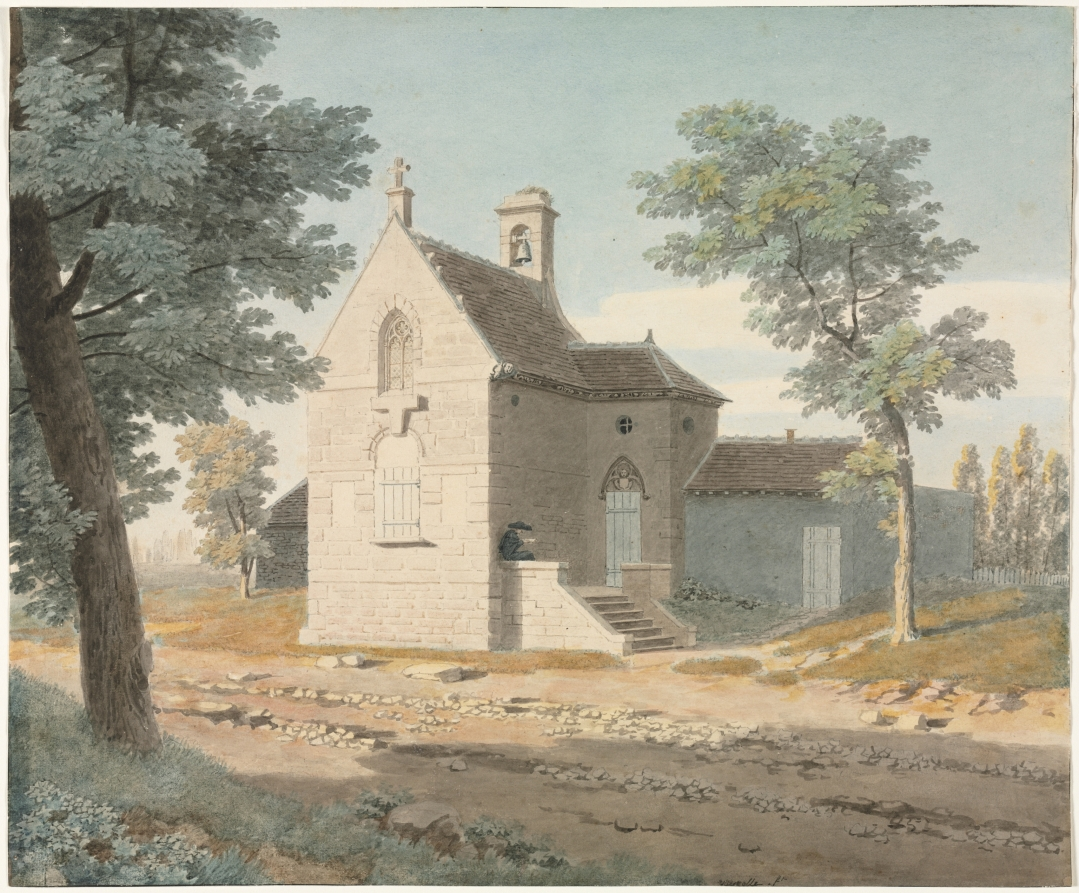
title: Church by a Road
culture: France, late 18th-early 19th century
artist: Jean Lubin Vauzelle (French, 1776–after 1837)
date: late 1700s-1800s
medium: watercolor with graphite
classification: Drawing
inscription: Signed lower right margin in brown ink: Vauzelle ft